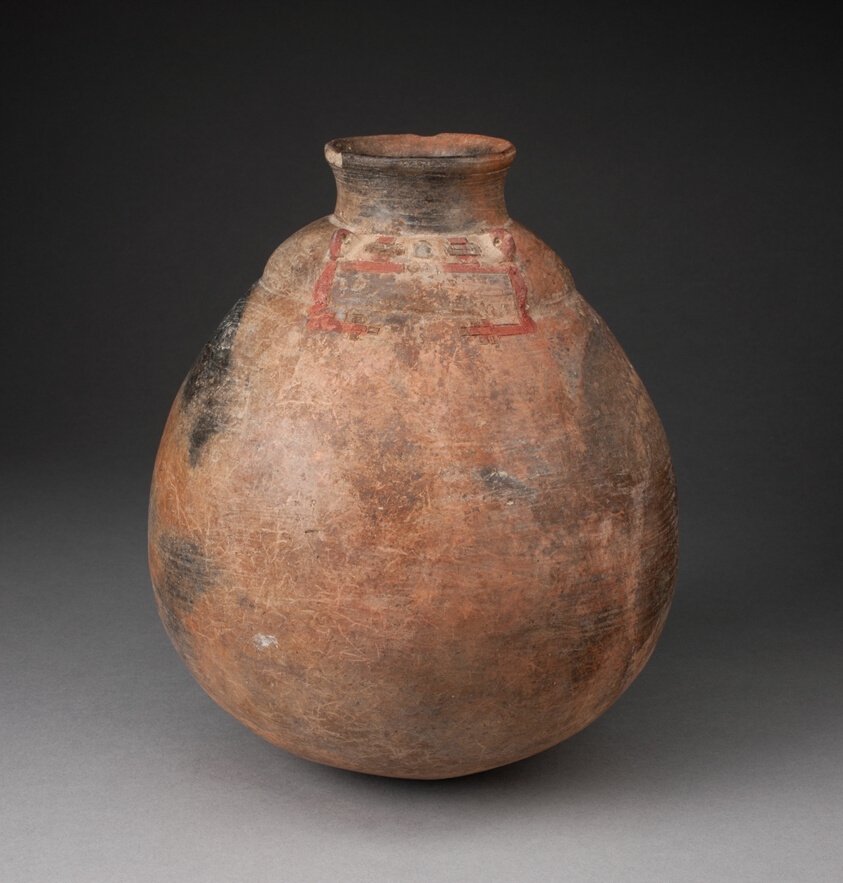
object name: Vessel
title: Jar with Abstract Human Face Painted on Shoulder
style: paracas, early horizon, Pre-Columbian, americas, Arts of the Americas, andean, andes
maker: Paracas (Ica Valley, south coast, Peru)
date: 650–150 BCE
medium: Ceramic and pigment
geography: Peru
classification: earthenware; art of the americas; ceramics; vessel